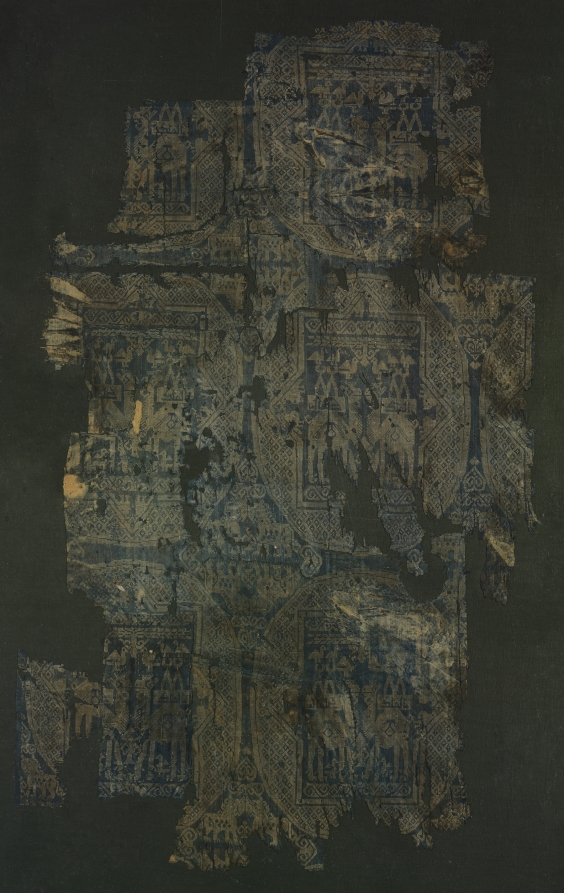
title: Roundels with camels bearing howdahs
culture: Syria (?), 900s - 1000s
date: 900s–1000s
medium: silk: plain weave variation with supplementary weft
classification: Textile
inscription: al-mulk lillah (Dominion belongs to God)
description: This unusually large fragment is part of a rare group of silks characterized by an unusal weave structure. The group is most important, however, because the Kufic inscriptions (here "mulk," or "Dominion," an abbreviation of "al-mulk lillah," meaning "Dominion belongs to God") demonstrates their Islamic origin. The Byzantine motifs found in some of them (for example, a second fragment in the museum collection), however, lead scholars to believe they may have been woven in Antioch, the scene of much fighting between Muslims and the Crusaders. These fragments become, therefore, fascinating evidence of two traditions occurring in one area.